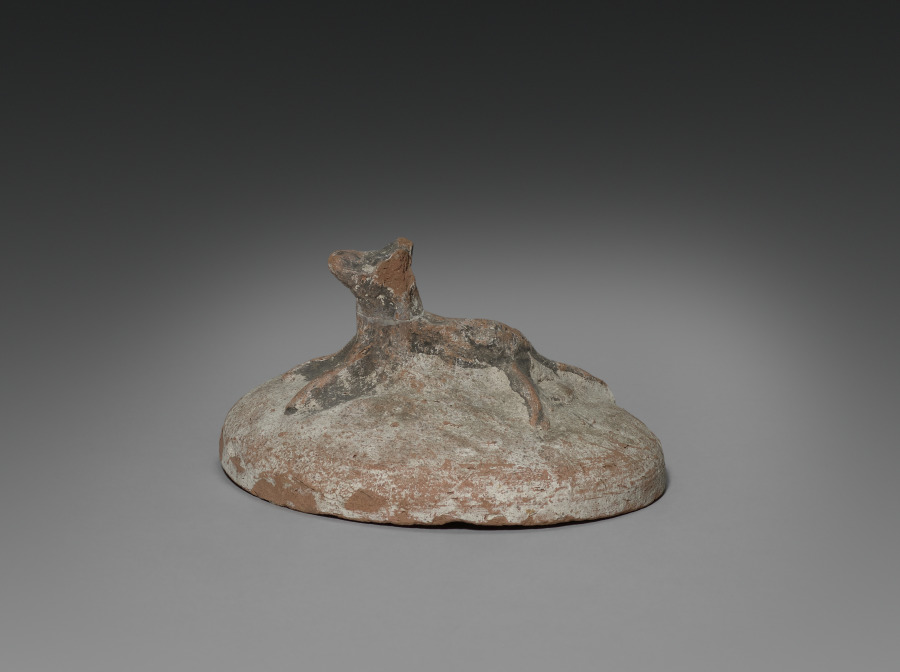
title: Shawabty Jar with Lid (lid)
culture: Egypt, New Kingdom (1540–1069 BCE), Dynasties 19–20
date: 1295–1069 BCE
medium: Nile silt ware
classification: Funerary Equipment